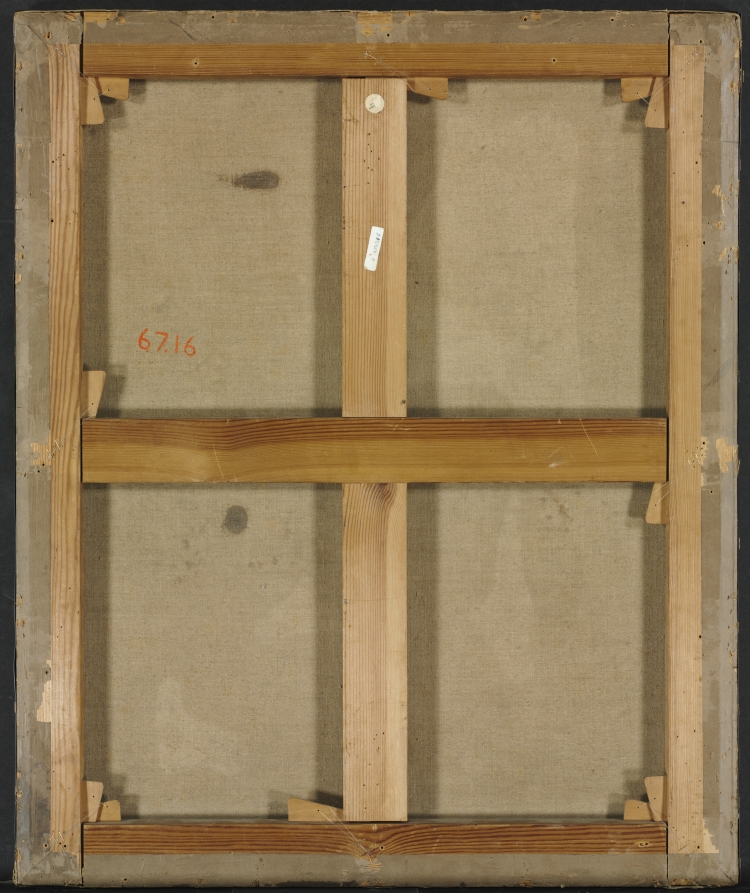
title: An Elderly Man in Prayer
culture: Netherlands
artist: follower of Rembrandt van Rijn (Dutch, 1606–1669)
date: 1660s or later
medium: oil on canvas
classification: Painting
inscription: Signed and dated at middle-right: "Rembrand[t]/ f.166[1]" (Last letter of name and last digit of date are no longer visible).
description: Toward the end of his life, Rembrandt explored religious themes from an intimate perspective, producing a number of works for a possible Apostle series. The personal religiosity of An Elderly Man in Prayer, formerly attributed to Rembrandt, bears resemblance to such late works. Seated with eyes nearly closed and hands clasped in prayer over a large book, the figure appears still and introspective. While the dramatic lighting and dark color palette are reminiscent of Rembrandt's late works, this painting, formerly attributed to the artist, has since been assigned to a follower or a later eighteenth-century imitator of Rembrandt's style for reasons associated with the broad, flat brushwork of the garment, the poor handling of shadow on the hands, and the uniform treatment of the hair.